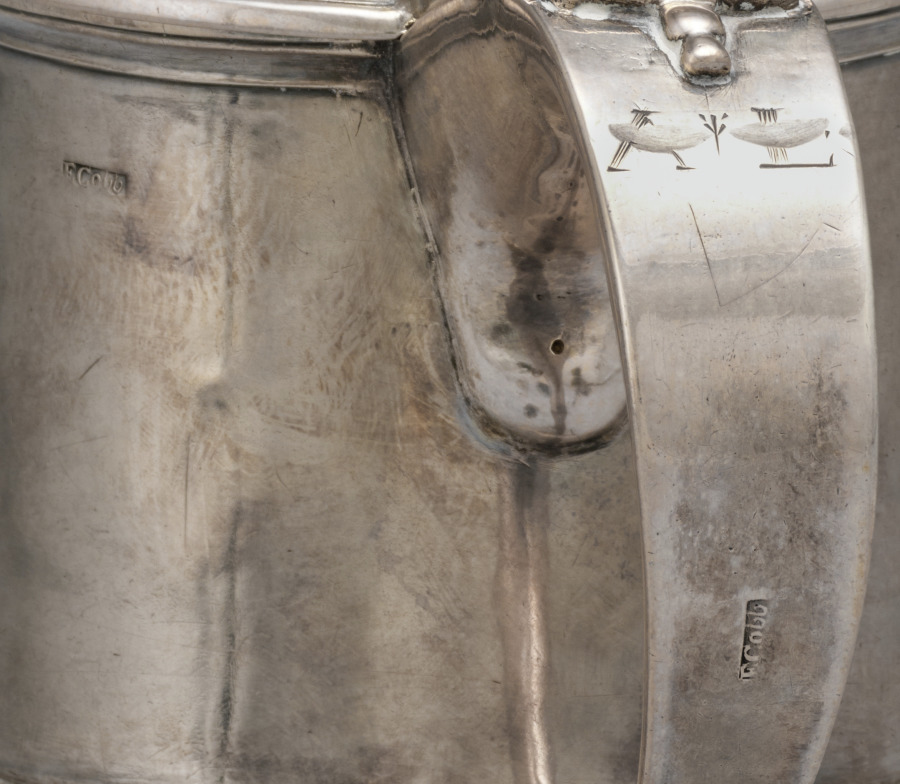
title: Tankard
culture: America, Massachusetts, Plymouth, 18th century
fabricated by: Ephraim Cobb (American, 1708–1775/77)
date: c. 1730–1740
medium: silver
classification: Silver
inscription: engraved "A * L" in block letters on top of handle, and "Anna Leonard" on bottom.